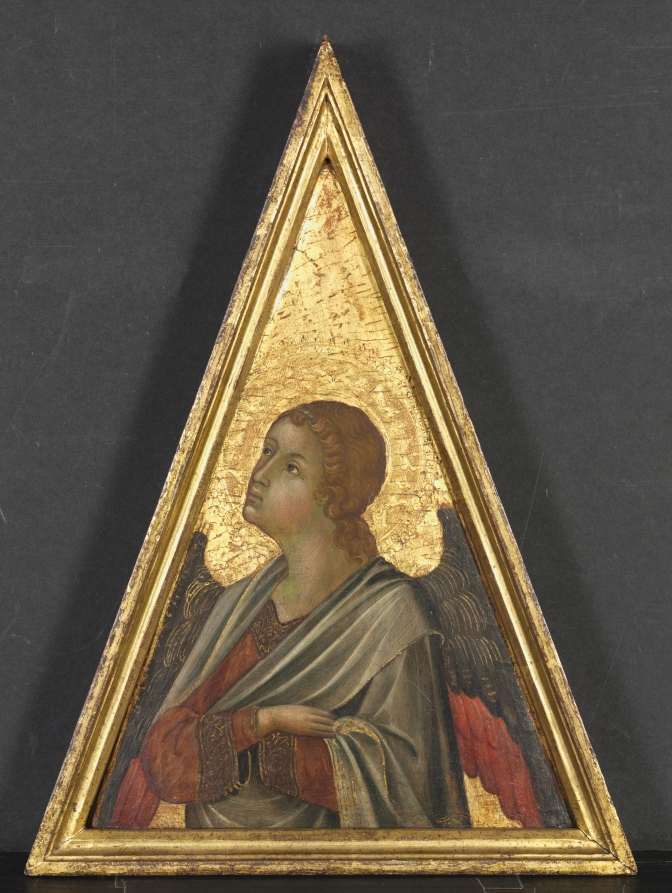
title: Pinnacle with Angel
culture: Italy, Siena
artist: circle of Niccolò di Segna (Italian)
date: c. 1340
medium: tempera and gold on wood panel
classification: Painting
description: These pinnacles were originally set on top of a multipanel altarpiece that has now been lost. The angels' gestures and glances suggest that they were placed to the left and right of a central image.